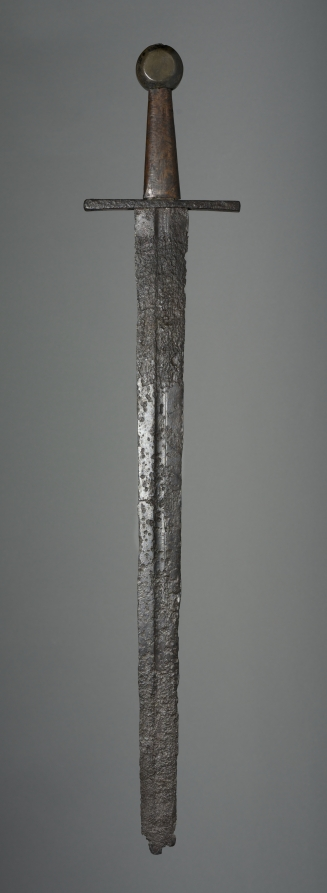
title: Sword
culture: Germany(?)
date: c. 1350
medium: iron; wood grip and brass pommel replacements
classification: Arms and Armor